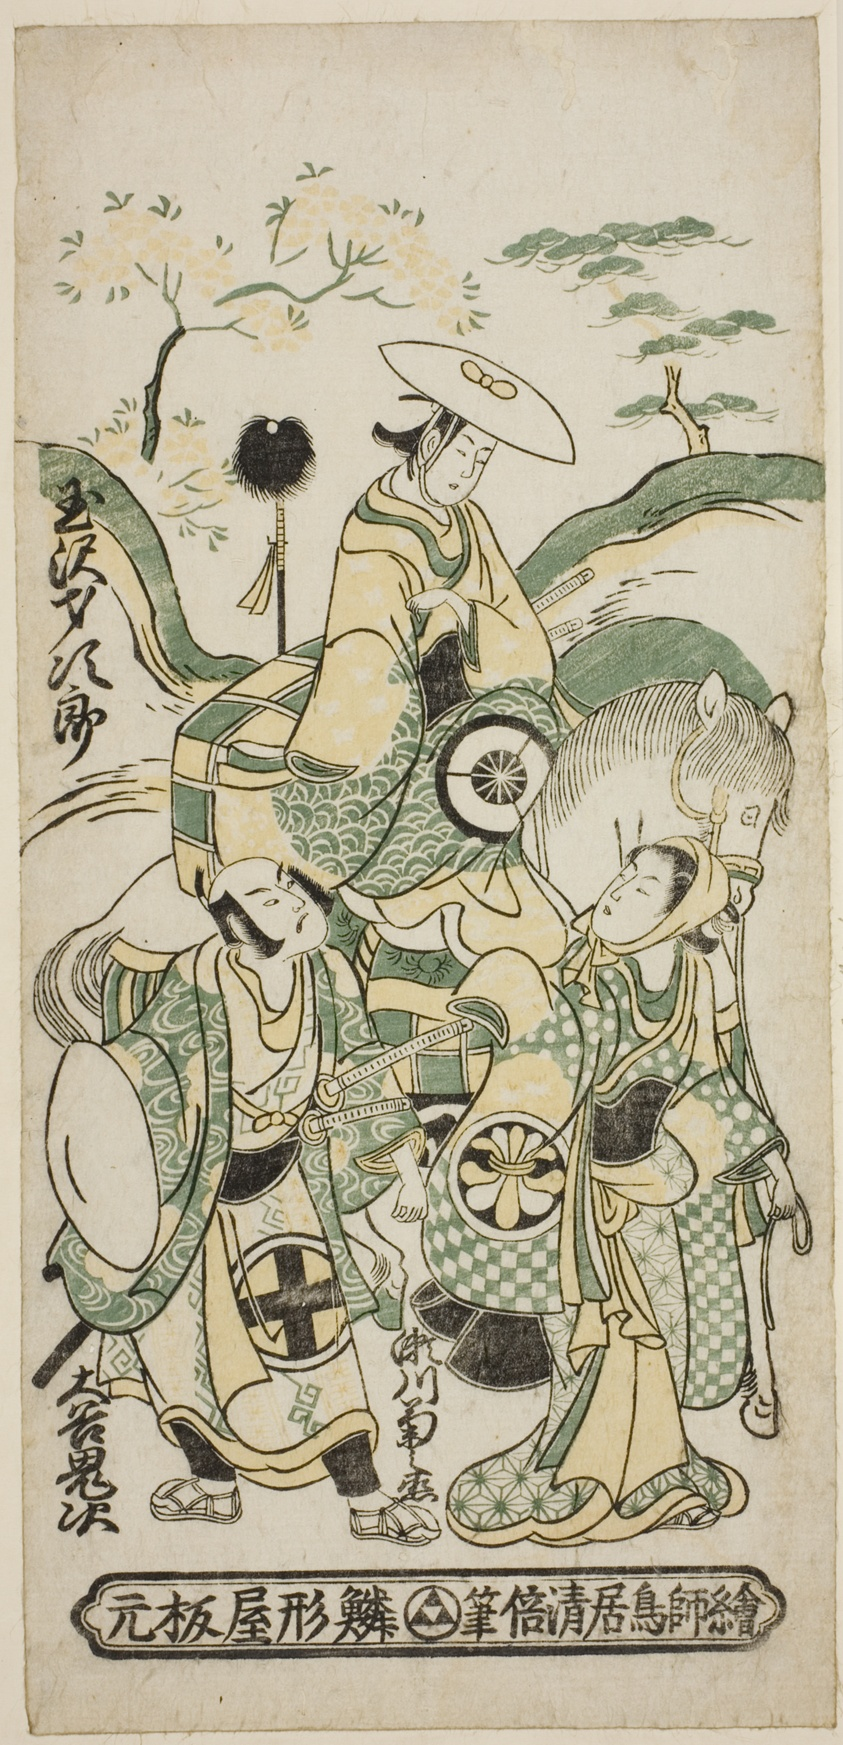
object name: Print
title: The Actors Tamazawa Saijiro I as Ushiwakamaru, Segawa Kikunojo I as Oroku, and Otani Oniji I as Matano Goro in the play "Sazareishi Suehiro Genji," performed at the Nakamura Theater in the first month, 1744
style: Japanese (culture or style)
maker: Torii Kiyomasu II (Japanese, 1706 (?)–1763 (?))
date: 1744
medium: Color woodblock print; hosoban, benizuri-e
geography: Japan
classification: woodblock print; print; asian art